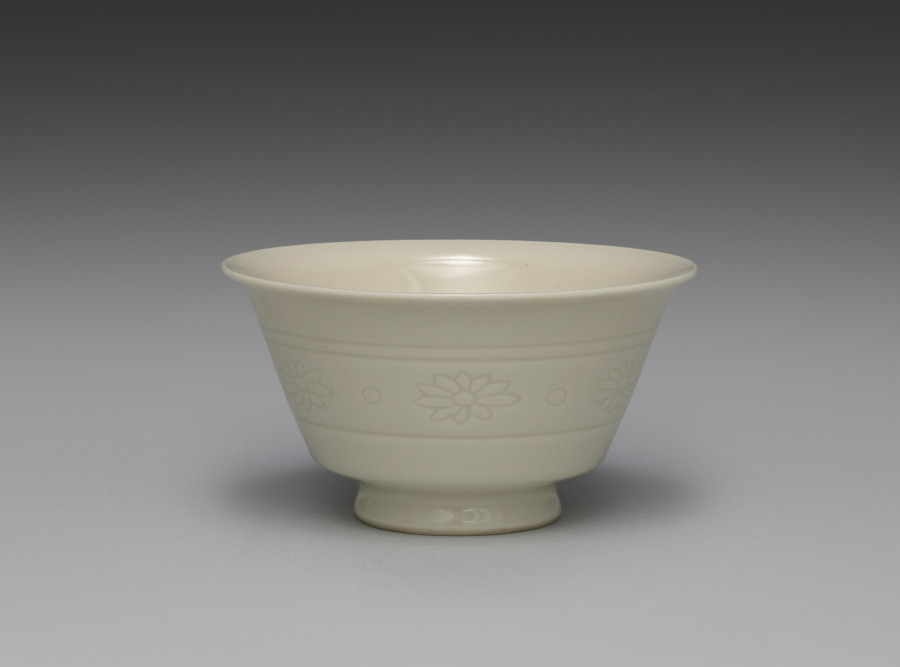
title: Teacup from Teacups with Floral Band Motif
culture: Japan, Meiji period (1868–1912)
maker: Seifū Yohei III (Japanese, 1851–1914)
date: 1893–1914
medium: One from a set of five cups; porcelain with incised decoration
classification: Ceramic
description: The five sencha teacups in this set are decorated with incised flowers and dots between a double band at the top and a single band at the bottom. They are in Yohei III’s creamy taihakuji body and glaze. In their motifs, they are quite similar to an incense burner by Yohei III (see CMA 2022.180), but the flowers are even more simple in design, with no open circle at the center. A label affixed to the side of the box refers to them as “sencha cups in emulation of Korean white [ware].” The reference to Korean ware indicates that even though Yohei was more directly inspired by Qing-dynasty wares from the Dehua kilns in Fujian Province in developing his porcelain clay and glaze for works such as these, the general understanding of the continental models still placed them, at least in terms of color, among pieces broadly associated in Japan with Korean white wares. The delicate cups are thinly potted, so they have a highly desirable translucency.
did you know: The delicate cups in this set are thinly potted, so they have a highly desirable translucency.